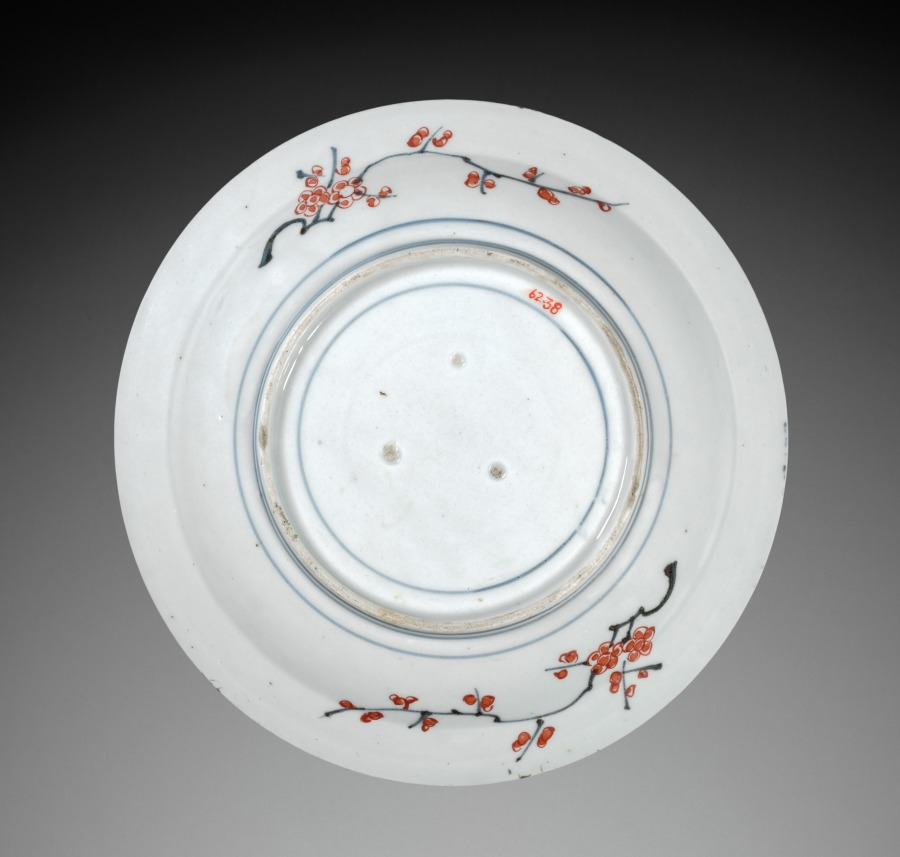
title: Plate with Vase of Peonies: Imari Ware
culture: Japan, Edo period (1615–1868)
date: c. 1700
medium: porcelain with decoration in underglaze blue overglaze, and gold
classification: Ceramic